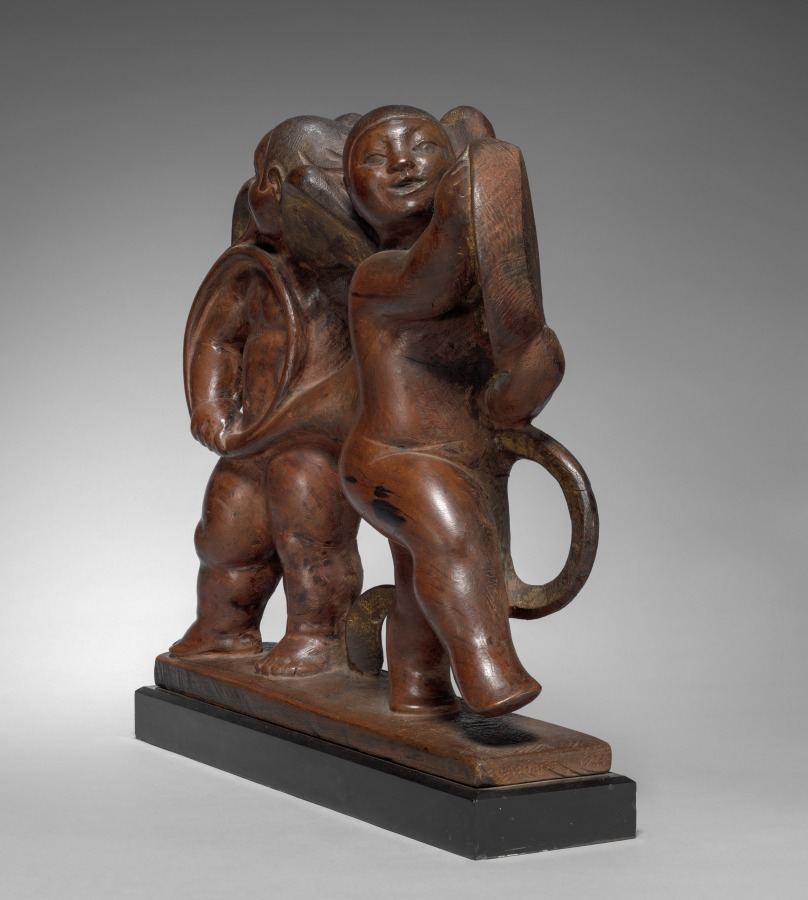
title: Dancing Children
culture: America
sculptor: Gaston Lachaise (American, born France, 1882–1935)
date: 1923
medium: wood with traces of gilt and polychrome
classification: Sculpture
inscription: Signed on right end of base: G. LACHAISE 1923